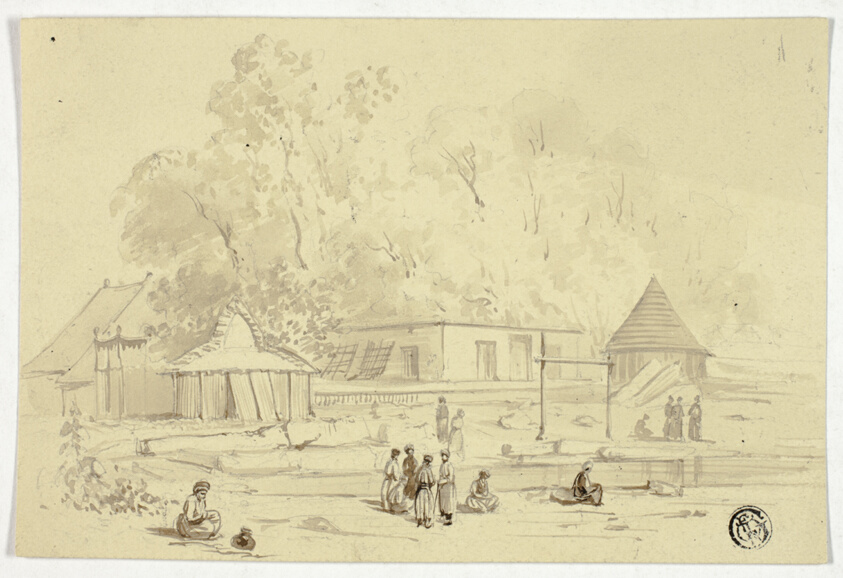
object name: Drawing and Watercolor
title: Indian Village Beside Stream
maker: Unknown Artist; British, 18th century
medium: Pen and brown ink, with brush and brown wash, with graphite and traces of brush and brown gouache, on cream wove paper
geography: United Kingdom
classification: ink or chalk wash; drawings (visual works); prints and drawing